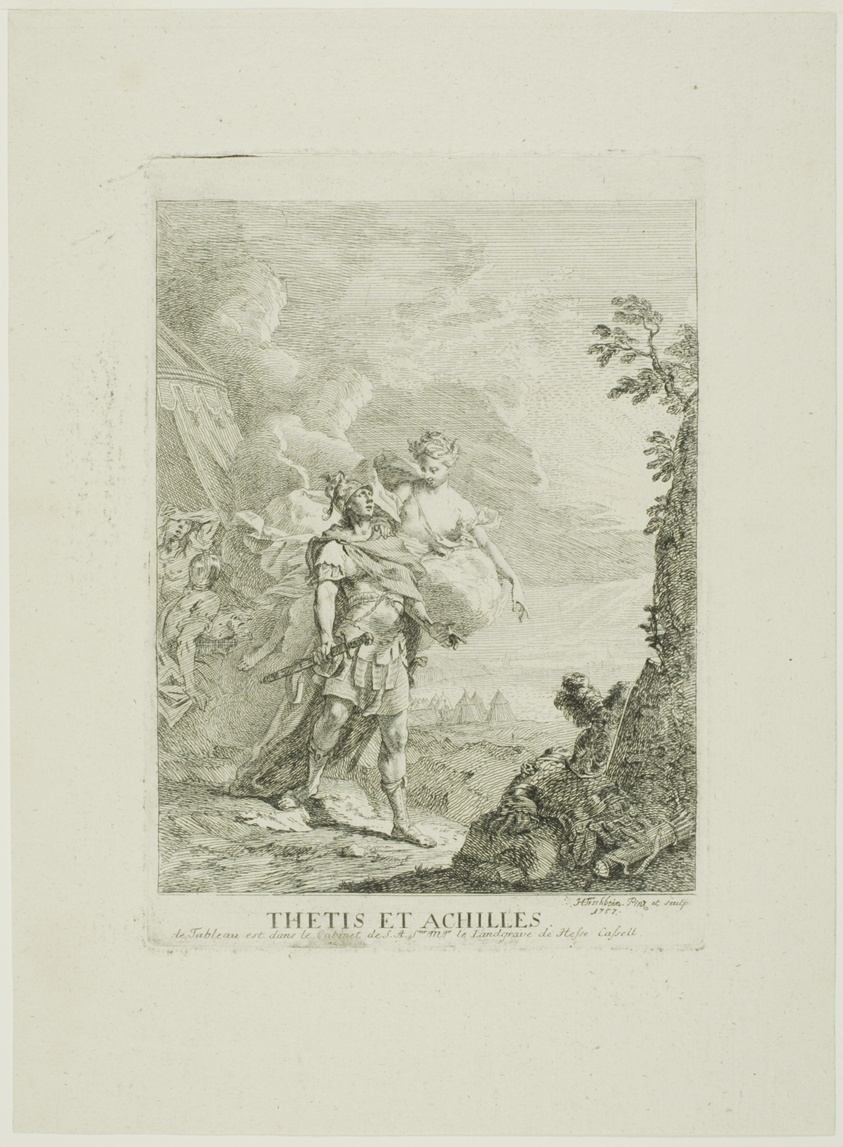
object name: Print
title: Thetis and Achilles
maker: Johann Heinrich Tischbein, I (German, 1722-1789)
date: 1757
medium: Etching on ivory laid paper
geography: Germany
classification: etching; print; prints and drawing